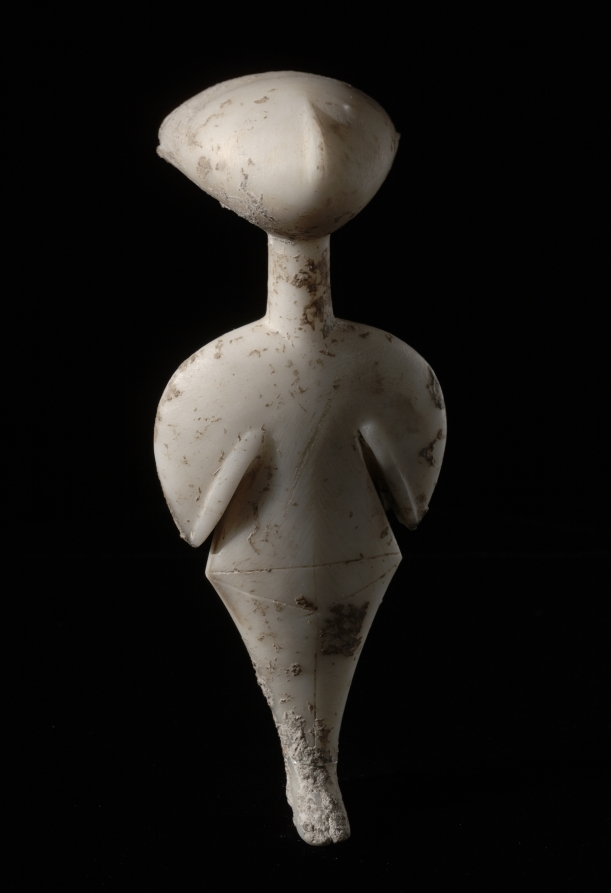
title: Statuette of a Woman: "The Stargazer"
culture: Western Anatolia, early Bronze Age (c. 3300–1200 BCE)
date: c. 3000 BCE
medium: marble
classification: Sculpture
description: "The Stargazer" moniker was given to this diminutive marble sculpture because its upturned head looks toward the heavens. Details carved into the stone are visible while painted features have been lost to time. We do not know how this object was used, but its enigmatic nature invites speculation.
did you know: We can identify this mysterious figure as female by the inscribed pubic triangle below her waist.